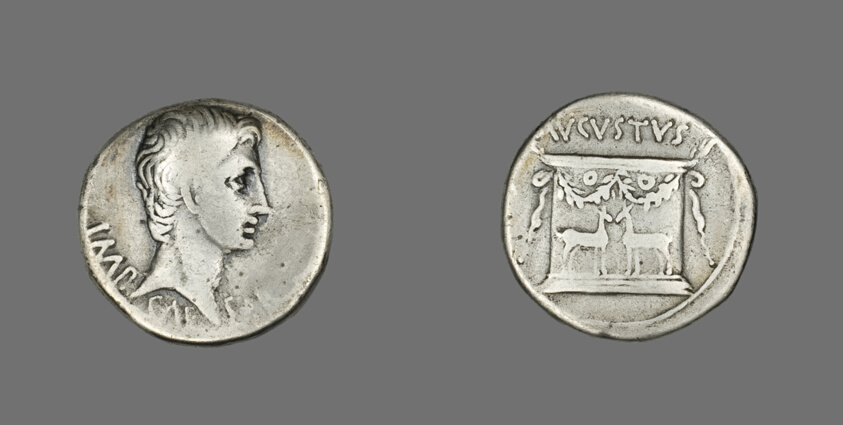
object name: Coin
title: Cistophoric Tetradrachm (Coin) Portraying Emperor Augustus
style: roman (ancient, style or period), ancient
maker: Roman, minted in Ephesus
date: about 25 BCE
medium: Silver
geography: Roman Empire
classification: coin; ancient art